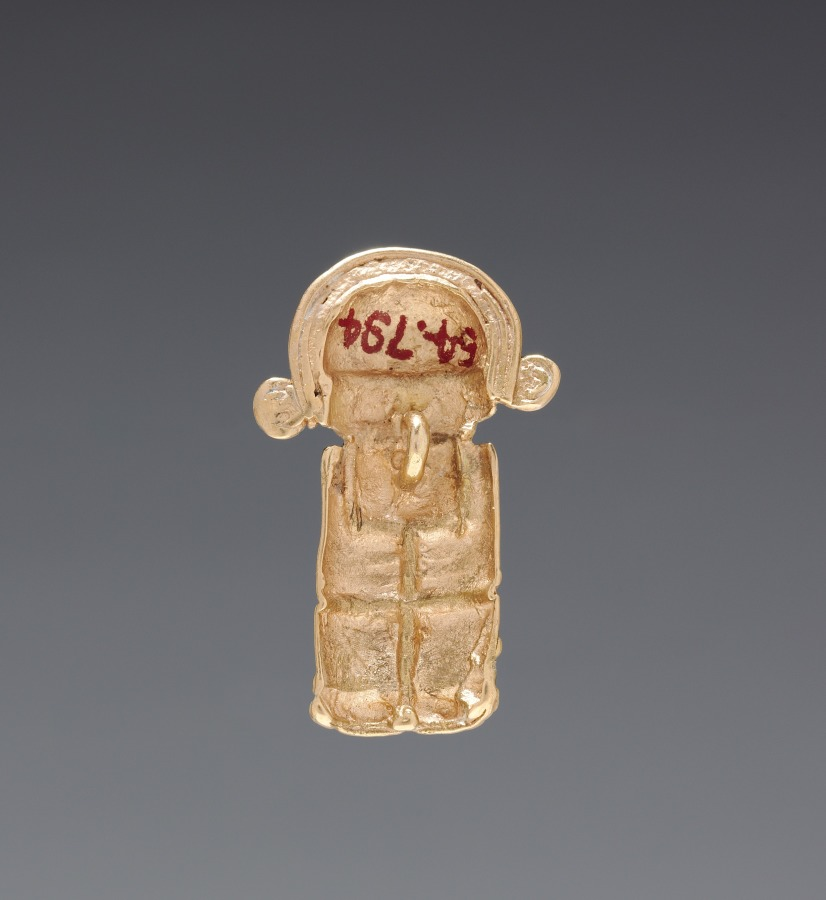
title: Necklace Figurine Bead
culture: Colombia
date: 1–700 CE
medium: cast gold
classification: Jewelry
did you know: Working with gold dates back to at least 500 BC in Ecuador and Colombia.